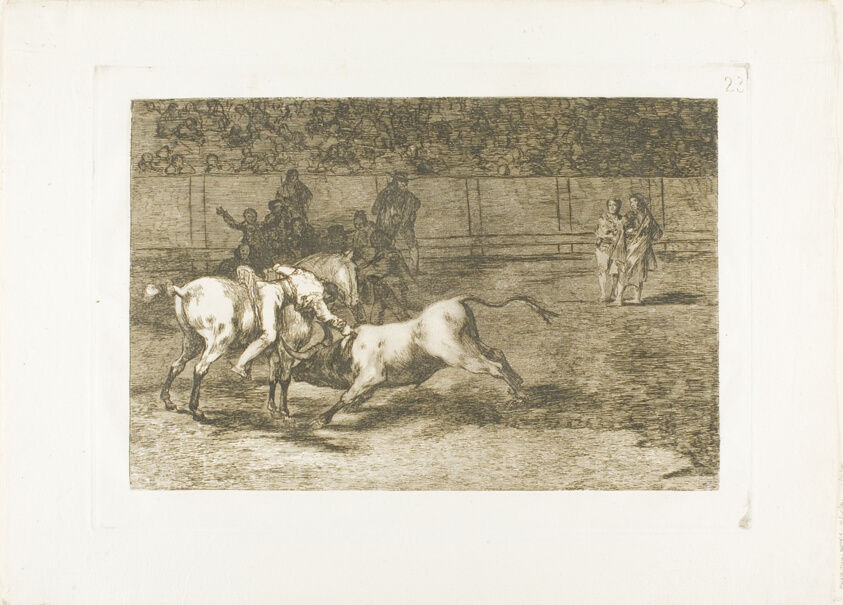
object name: Print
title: Mariano Ceballos, alias the Indian, kills the bull from his horse, plate 23 from The Art of Bullfighting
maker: Francisco José de Goya y Lucientes (Spanish, 1746-1828)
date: 1814/16, published 1816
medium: Etching and burnished aquatint on ivory laid paper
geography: Spain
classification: etching; print; prints and drawing